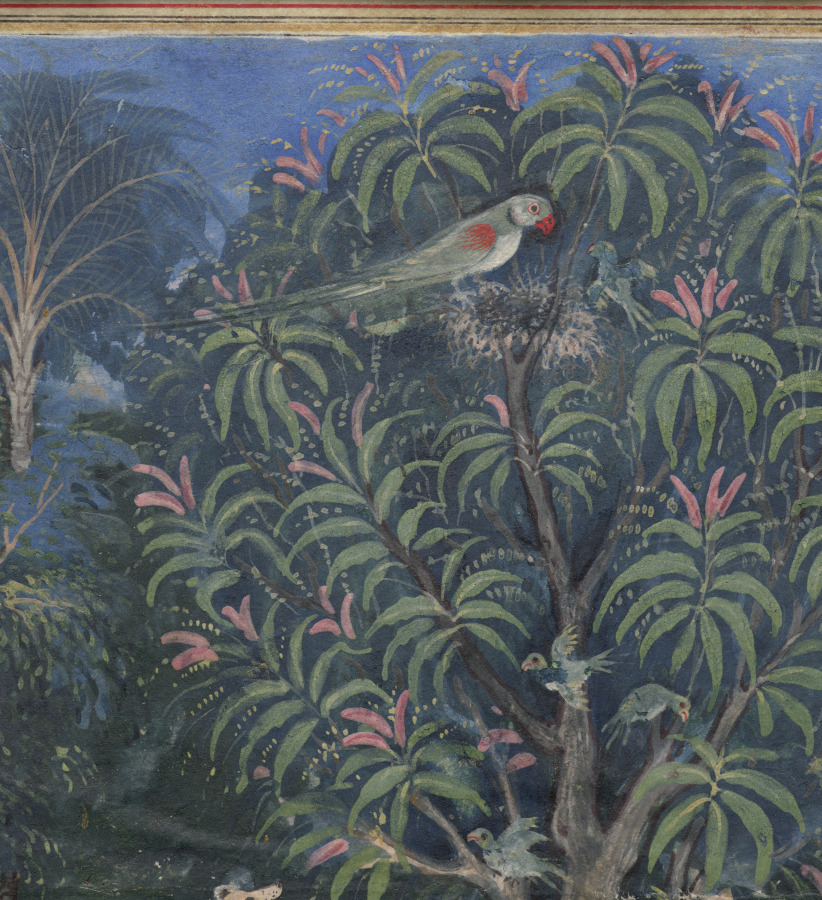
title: The parrot mother cautions her young on the danger of playing with foxes, from a Tuti-nama (Tales of a Parrot): Fifth Night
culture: Mughal India, court of Akbar (reigned 1556–1605)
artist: Dasavanta (Indian, d. 1584)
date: c. 1560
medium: gum tempera, ink, and gold on paper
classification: Painting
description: One night the parrot Tuti tells Khujasta that he hopes her relationship with her new lover does not wind up being only half-baked, like the medical treatment of the king of Kamarupa. She asks what that was about, and Tuti begins the story by telling of a mother parrot who lived in the forest with her young, who liked to play with the fox cubs who lived at the base of the tree. The mother parrot is perched on the edge of her treetop nest.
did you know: A fox cub suckles contentedly, as the mother keeps a sharp eye on the others.